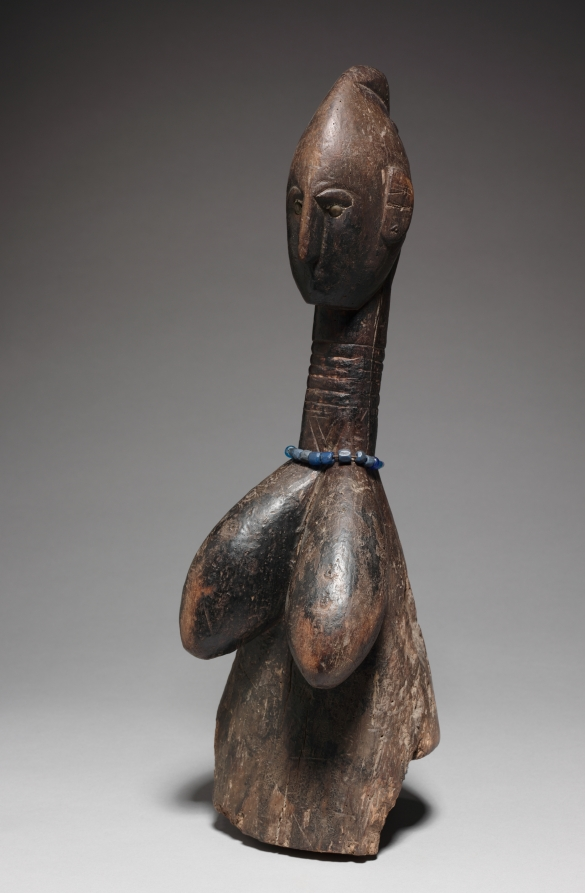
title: Headdress (Zigiren-Wɔndɛ)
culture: Africa, West Africa, Guinea, Baga-style carver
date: early to mid-1900s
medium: Wood, glass beads, upholstery studs, and natural fiber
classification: Mask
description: Owned and used for entertainment by young unmarried men only among some Baga subgroups, this type of headdress is said to represent the Maiden, a beautiful young woman. With a beaded necklace and eyes embellished with furniture tacks, the headdress was attached to a cone-shaped costume consisting of colorful cloths and raffia and constructed over a bamboo armature.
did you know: The performer of this mask grasped the projecting "legs" to steady it while balancing it on his head.